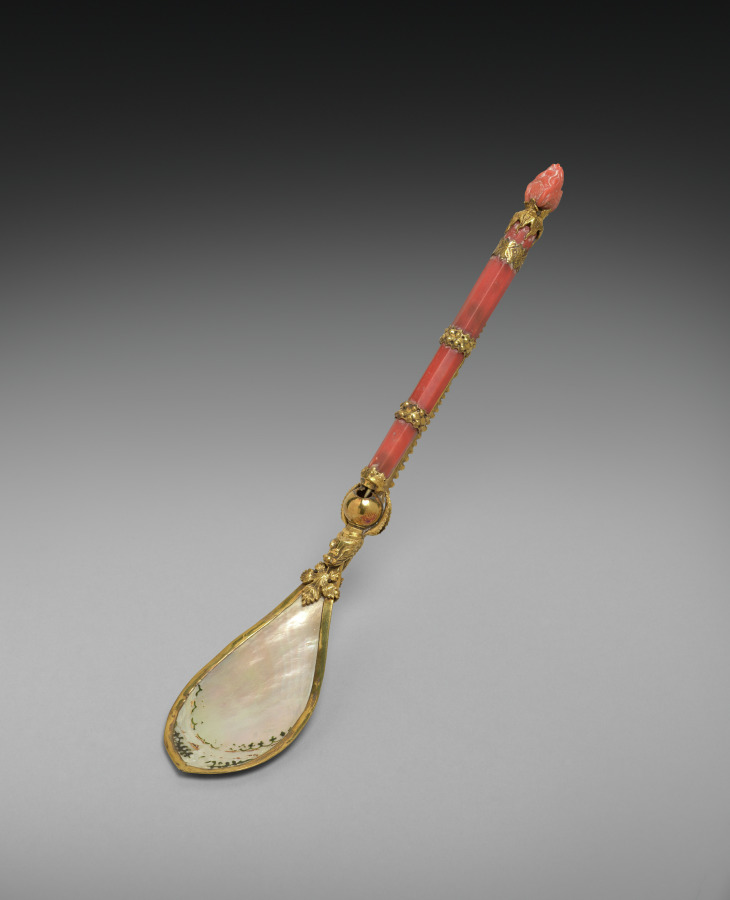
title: Spoon with Detachable Pick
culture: Italy, Venice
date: c. 1500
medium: enameled shell and coral, gilt-silver mounts; detachable pick with dragon's head finial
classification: Metalwork